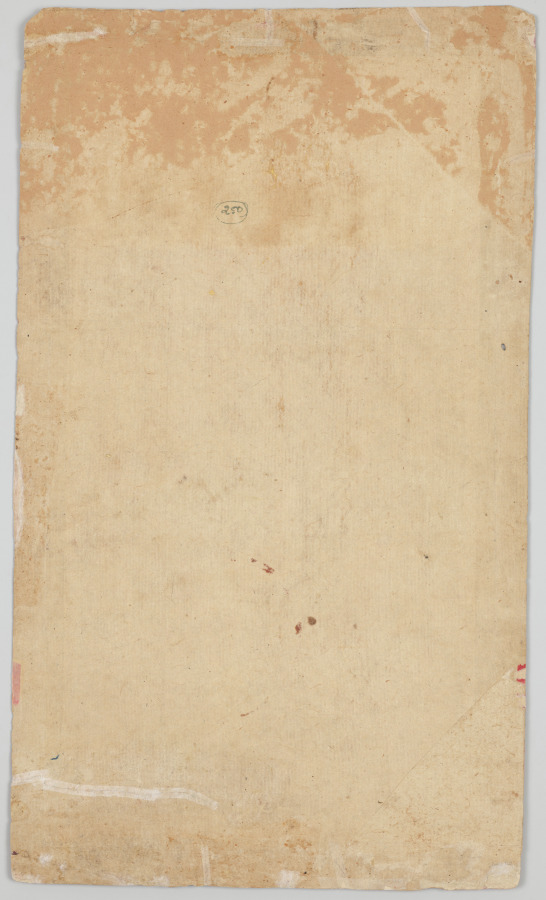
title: Sindhu Raga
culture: Northwestern India, Rajasthan, Rajput Kingdom of Mewar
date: c. 1720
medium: Gum tempera and ink on paper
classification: Painting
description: The inscription at the top identifies this painting as Sindhu Raga, which is the raga (or musical mode) of heroic sentiment. The painting is meant to elicit the same feelings in the viewer as a rousing piece of music played in the Sindhu key. Paintings of Sindhu Raga depict battle scenes. In this example, the composition conveys the chaotic melee and violence of war. Heads are being lopped off; carrion birds swoop down unfazed. Above the horizon against the sky at the far right is the god of war, Karttikeya, in his chariot. Three angels carry garlands for the dead.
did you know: Most of the warriors are on horseback and are armed with bows and arrows, swords, lances, and shields, as well as rifles. Two elephants appear in the foreground.